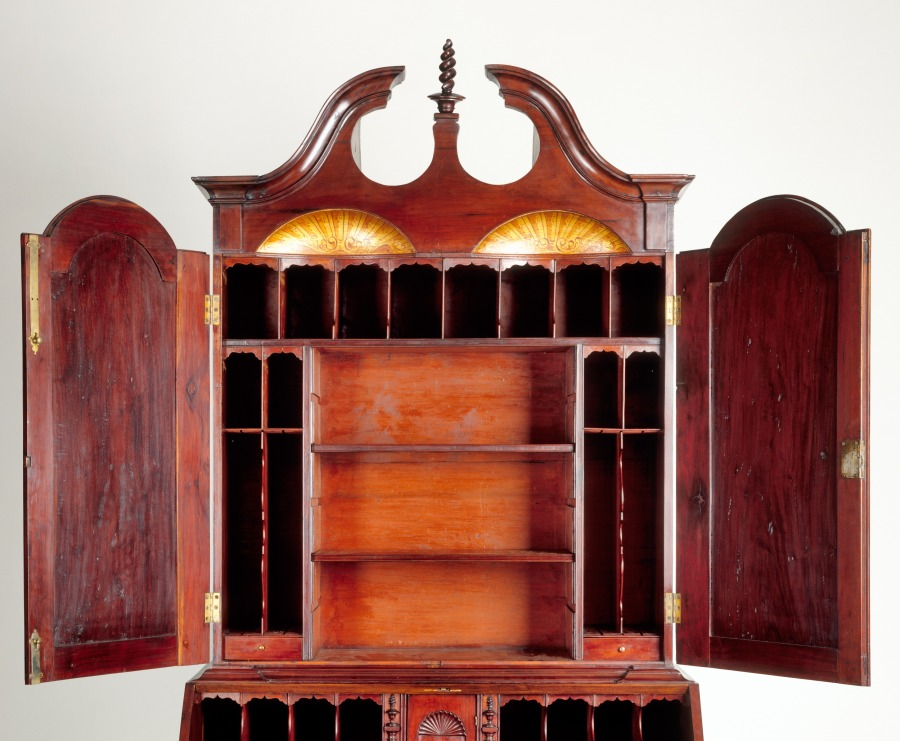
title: Desk and Bookcase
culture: America, Massachusetts, Boston or vicinity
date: c. 1780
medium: mahogany and pine, brass hardware, gilding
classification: Furniture and woodwork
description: During the 1700s, a desk and bookcase, sometimes called a bureau in early inventories, was among the largest and most expensive pieces of furniture in a household. Their owners were chiefly businessmen and community leaders, and because of their function as repositories for personal letters and documents, they were usually placed downstairs in a back parlor or hall. A desk and bookcase consisted of two parts: usually a slant-top desk below and a cabinet above that sat within moldings applied to the desktop to hold it in place. The form often included elements derived from contemporary architecture. Like much New England furniture of the later 1700s, the lower section of this example is block-fronted, in which the profile recedes in the center and protrudes at either side. Though some European precedents can be found for block fronting, this type of cabinetry was clearly more popular in America than anywhere else.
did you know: A desk and bookcase in the 1700s, often equipped with several locks and keys as in this example, served as a self-contained office for the gentleman of the household.